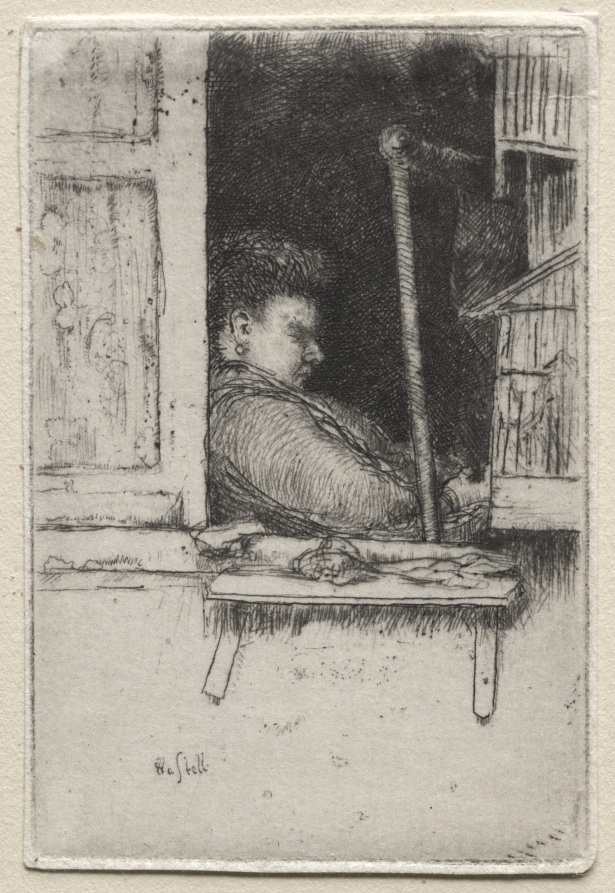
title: Paris: The Concierge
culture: America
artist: Ernest Haskell (American, 1876–1925)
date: 1910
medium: etching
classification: Print